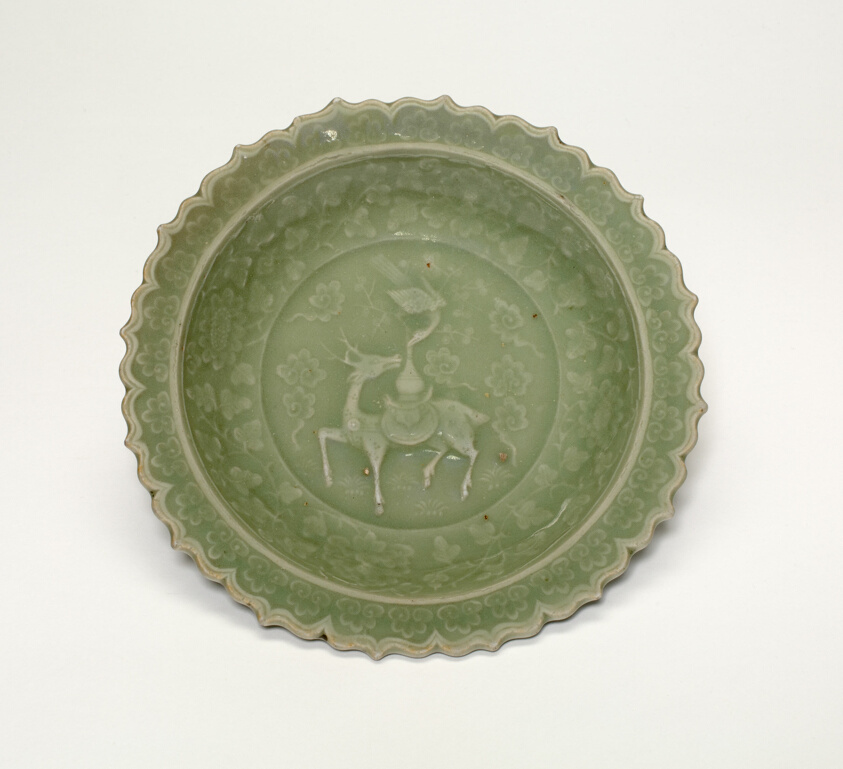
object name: Vessel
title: Foliate Dish with Crane and Deer Amid Clouds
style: Chinese (culture or style)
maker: China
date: Yuan dynasty (1279–1368), late 13th century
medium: Longquan ware; celadon-glazed stoneware with underglaze mold-impressed decoration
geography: China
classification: dish (vessel); stoneware; asian art; ceramics; vessel